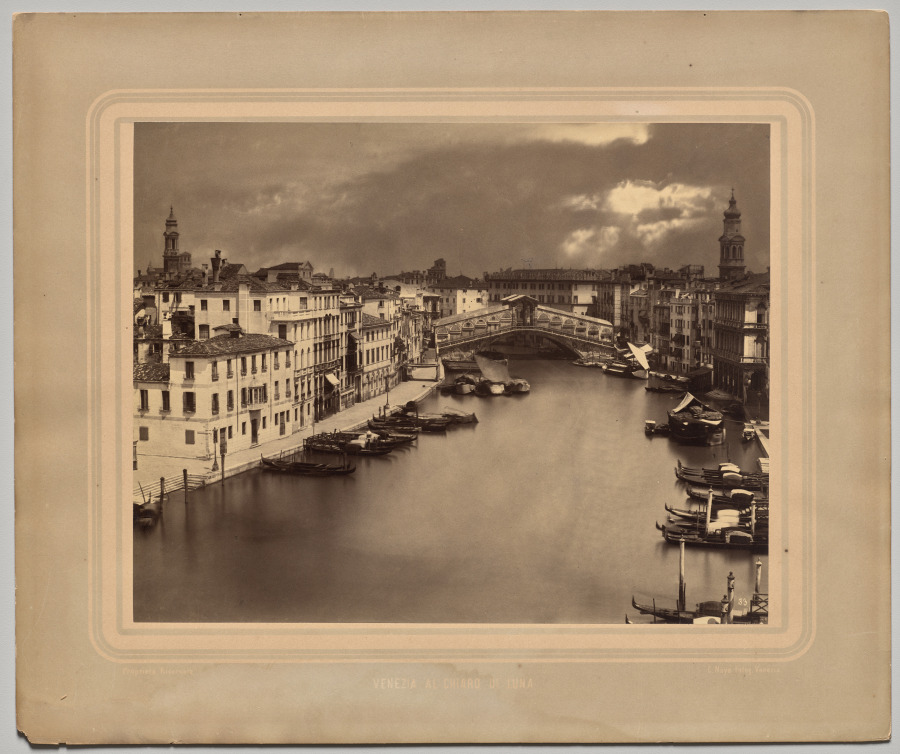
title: Venice in Moonlight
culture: Italy, 19th century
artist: Carlo Naya (Italian, 1816–1882)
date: 1870s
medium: albumen print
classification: Photograph